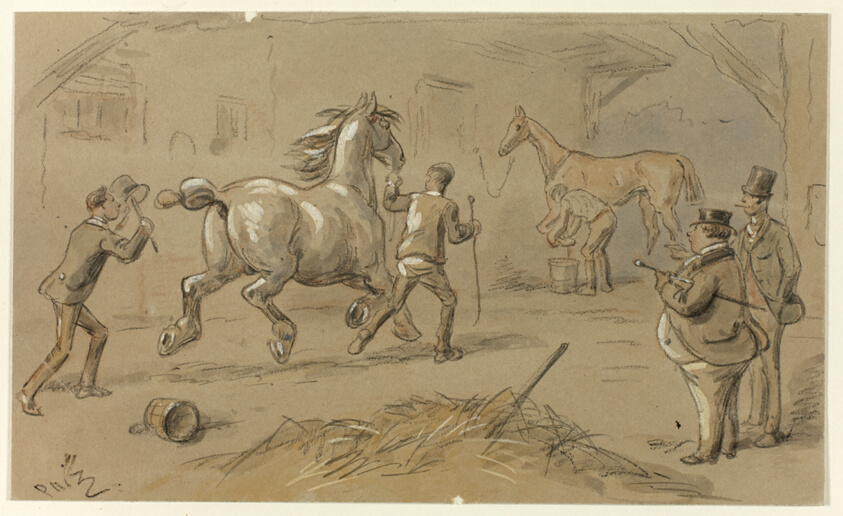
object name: Drawing and Watercolor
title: Just Up to Your Weight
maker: Hablot Knight Browne (English, 1815-1882)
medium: Watercolor and black crayon, heightened with white gouache, on pale brown wove paper, laid down on gray wove paper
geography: England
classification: watercolor; drawings (visual works); prints and drawing